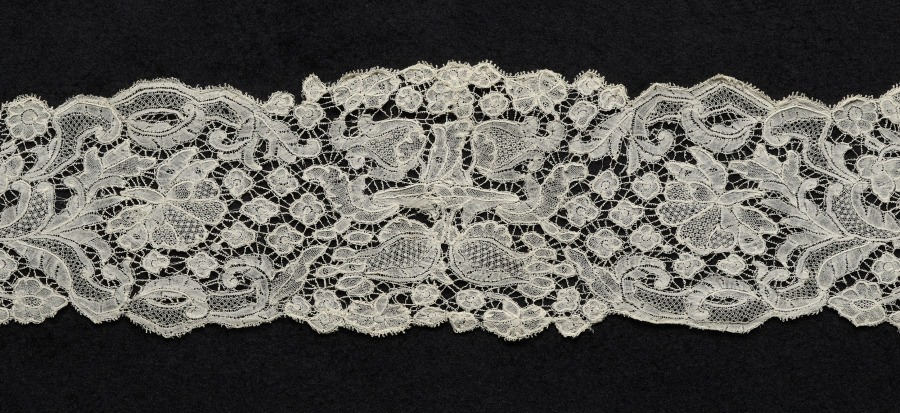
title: Lace Lappet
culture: Flanders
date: 1700s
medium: Linen; bobbin lace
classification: Lace